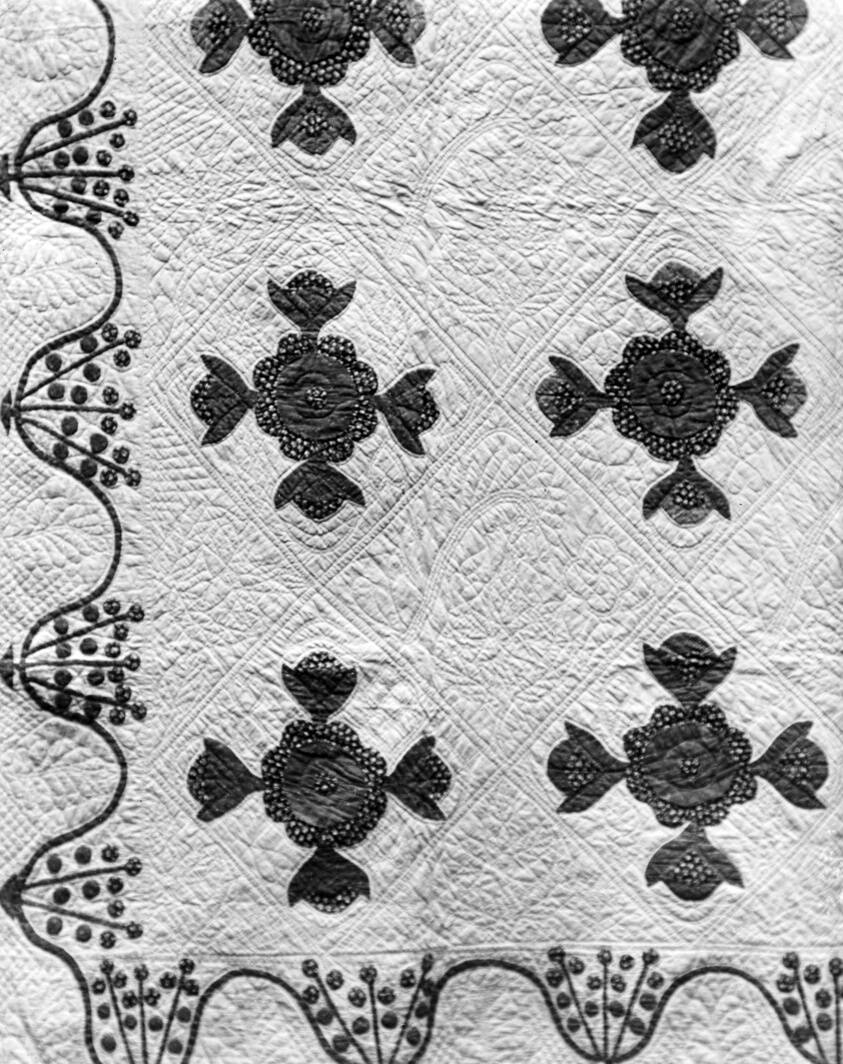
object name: Textile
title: Bedcover (Roses and Buds or Bride's Quilt)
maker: United States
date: c. 1845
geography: United States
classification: textile; needlework - quilt